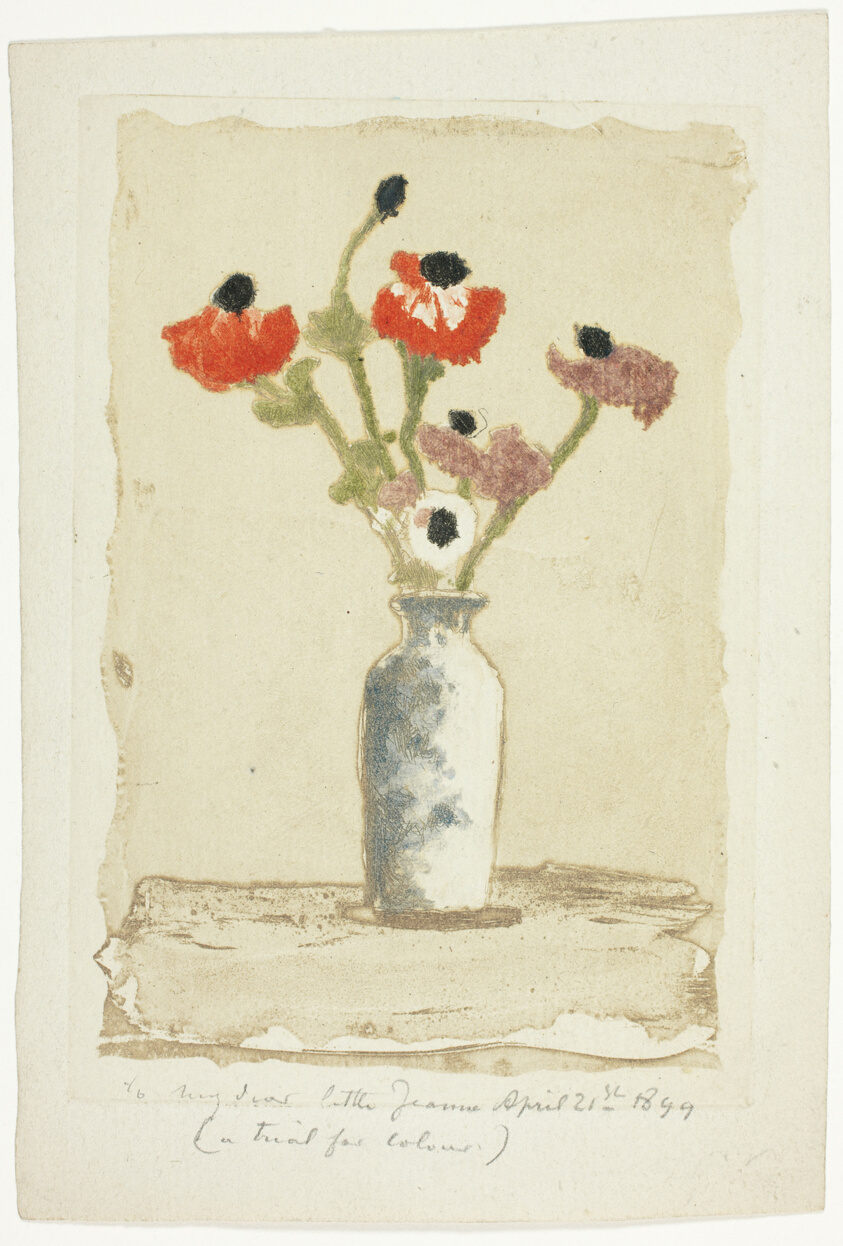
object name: Print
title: Anemonies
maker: Theodore Roussel (French, worked in England, 1847-1926)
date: 1897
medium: Color etching and aquatint on ivory laid paper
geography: England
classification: etching; aquatint; paper; print; prints and drawing